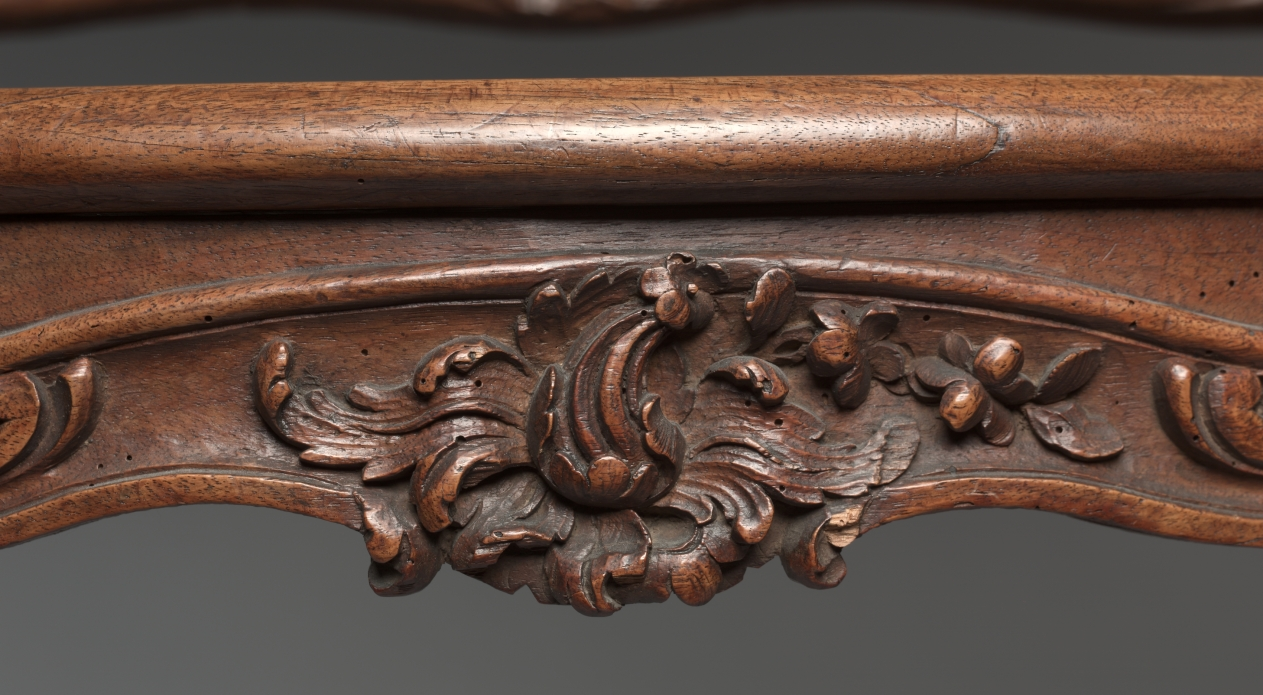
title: Armchair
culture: France, 18th century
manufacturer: René Cresson (French, c. 1705–c. 1749)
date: c.1740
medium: carved wood, cane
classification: Furniture and woodwork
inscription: signed underneath on strip across back: "CRESSON LAINE" (the trademark for René Cresson).